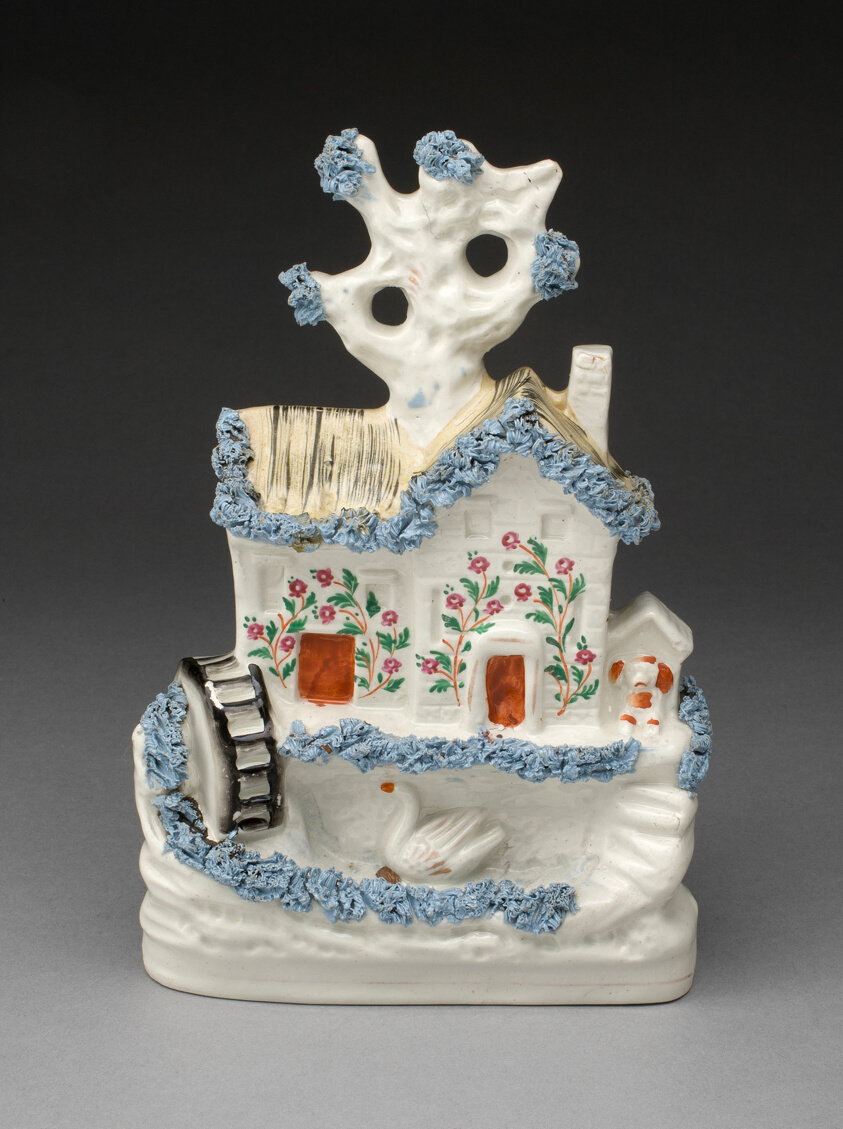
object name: Ceramics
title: Chimney Ornament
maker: England, Staffordshire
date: c. 1830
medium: Glazed earthenware with polychrome enamel decoration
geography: Staffordshire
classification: ceramics; european decorative arts